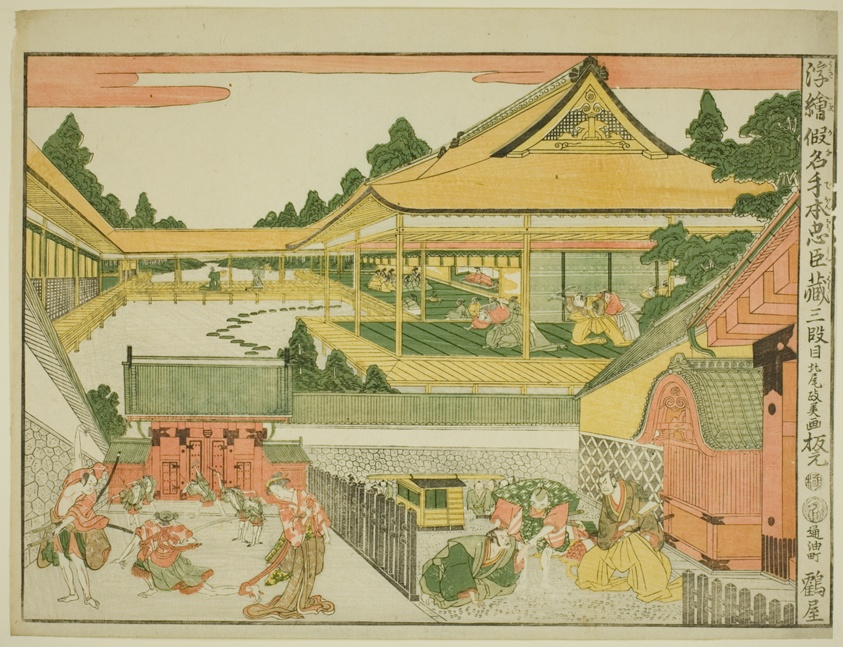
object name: Print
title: Act III (Sandanme), from the series "Perspective Pictures of the Storehouse of Loyal Retainers (Uki-e kanadehon Chushingura)"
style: Japanese (culture or style), edo (japanese period)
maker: Kitao Masayoshi (Kuwagata Keisai) (Japanese, 1764–1824)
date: c. 1791/94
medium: Color woodblock print; horizontal o-oban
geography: Japan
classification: woodblock; print